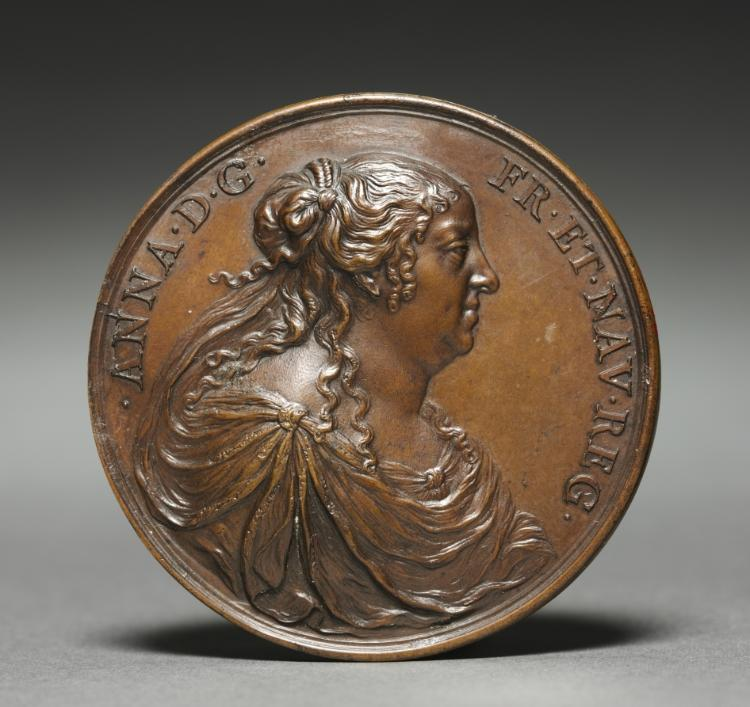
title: Medal of Anne of Austria (obverse)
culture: France, 17th century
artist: Jean Warin (French, 1604–1672)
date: 1660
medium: bronze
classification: Sculpture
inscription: inscribed: ANNA.D.G FR.ET.NAV.REG.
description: Jean Warin was the foremost medalist in 17th-century France. As the chief designer of coins, his relationship with King Louis XIII was exceptionally close; he convinced the king that commemorative medals were the most important artistic medium for propaganda. Warin revolutionized the production of medals by introducing the raised edge, allowing greater ease in striking medals. This change fueled the shift from casting medals to the more recently invented process of striking, or pressing medals from a die. This work is one of many he composed of Queen Anne of Austria (1601–1666). Although she was born in Spain as the Infanta, or princess, of Spain and Portugal, her title "of Austria" refers to her Hapsburg heritage as well as her title of Archduchess of Austria. The reverse depicts a blooming lily, a symbol of France, and is inscribed "its glories in its divine nourishment," referring to her son, the adolescent King Louis XIV.